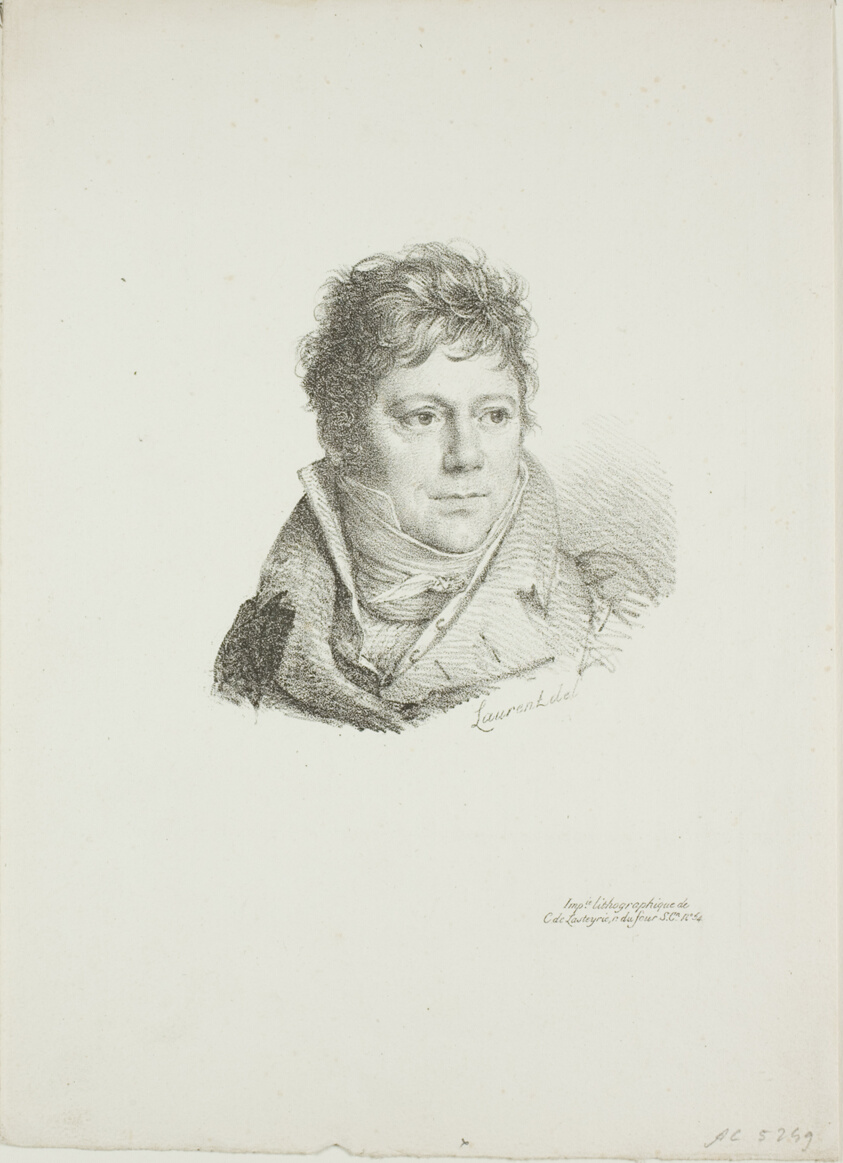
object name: Print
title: Portrait of M. Chenard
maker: Jean Antoine Laurent (French, 1763-1832); printed by Comte de Charles Philibert Lasteyrie du Saillant (French, 1759-1849)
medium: Lithograph in black on ivory wove paper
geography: France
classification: lithograph; print; prints and drawing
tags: portraits